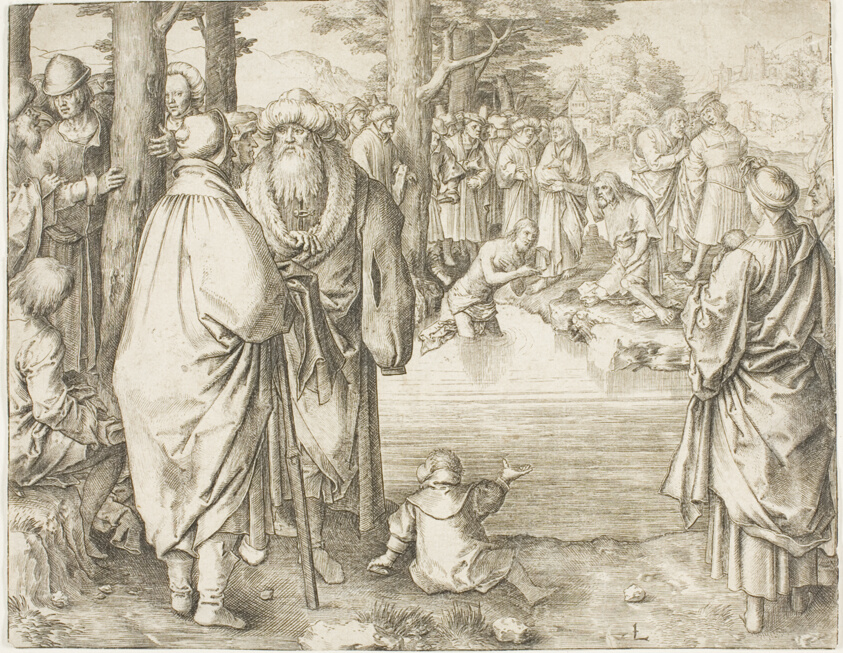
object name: Print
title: The Baptism of Christ in the River Jordan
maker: Lucas van Leyden (Netherlandish, c. 1494-1533)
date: about 1510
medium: Engraving in black on ivory laid paper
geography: Netherlands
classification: engraving; print; prints and drawing